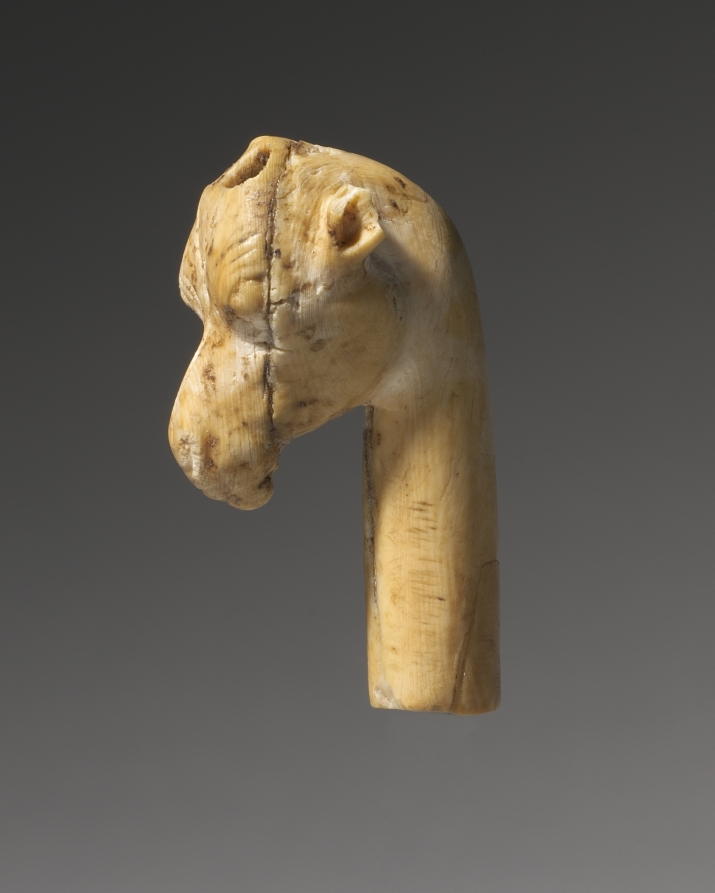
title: Giraffe Head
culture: Egypt, New Kingdom (1540–1069 BCE), Dynasty 18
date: c. 1540–1296 BCE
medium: ivory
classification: Cosmetic Objects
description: Both ancient Egyptian men and women loved cosmetics. Unguents, oils, and perfumes made from aromatic plant resins and gums were obtained at great cost from distant lands. The objects identified with cosmetics were given lavish treatment. The delicately head of a giraffe would have decorated an elaborate ivory cosmetic spoon.